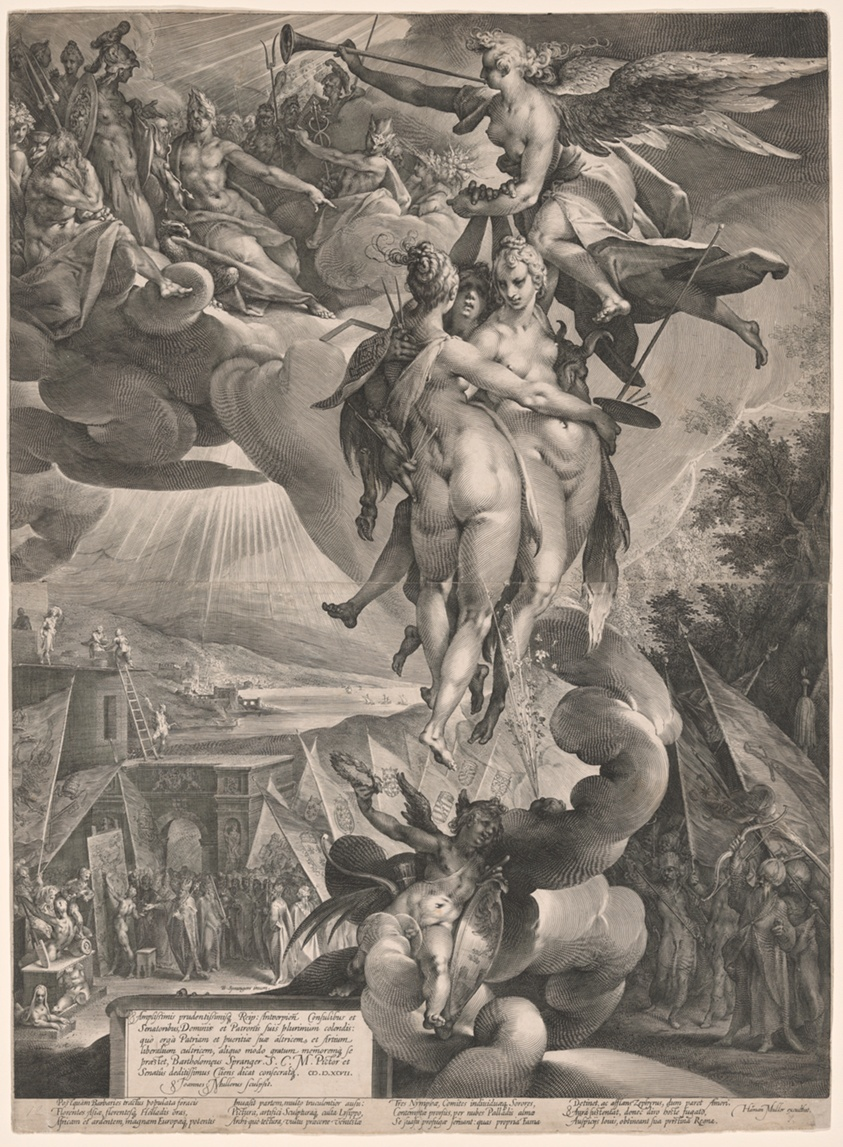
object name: Print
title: Apotheosis of the Arts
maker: Jan Harmensz Muller (Dutch, 1571–1628); after Bartholomeus Spranger (Flemish, 1546–1611)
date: 1597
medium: Engraving on two joined sheets of ivory laid paper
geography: Netherlands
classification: engraving; paper; print; prints and drawing